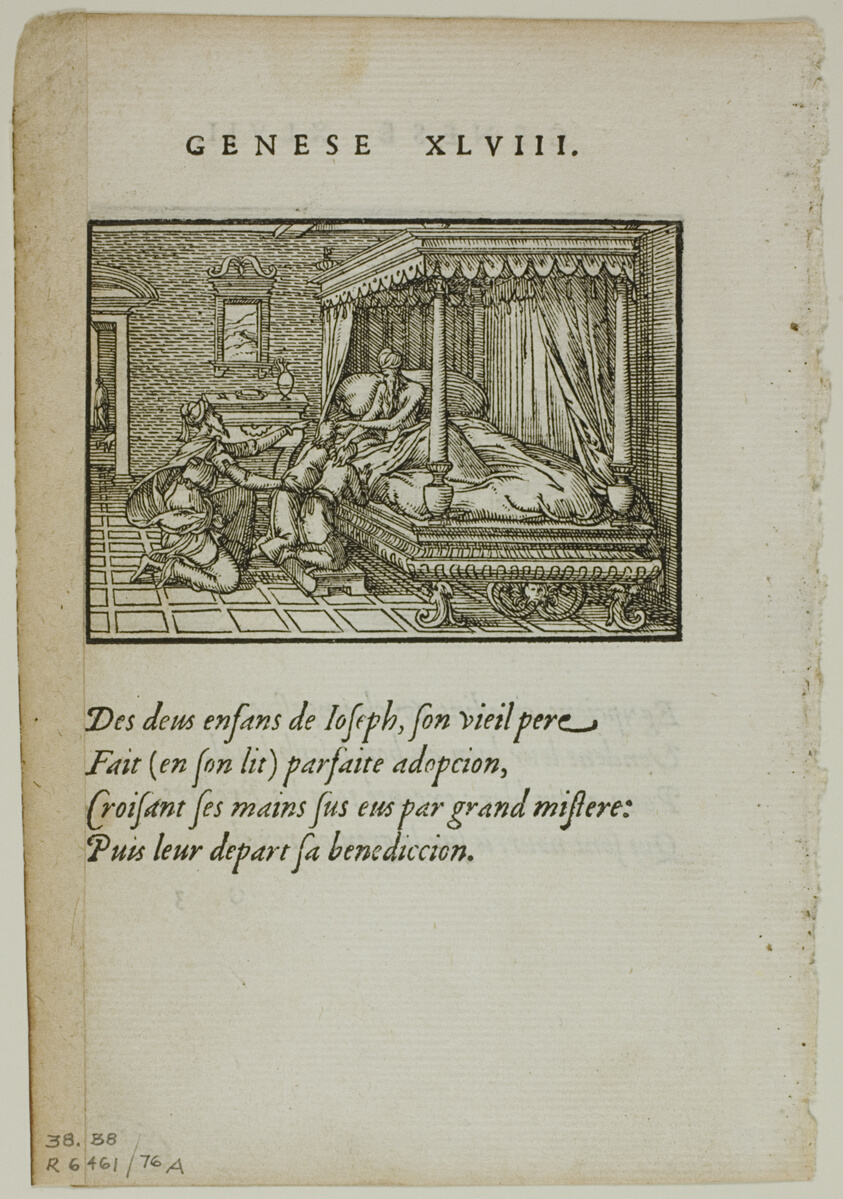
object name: Print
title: Jacob Blessing the Sons of Joseph (recto) and The Egyptians Sell their Goods to Joseph for Grain (verso) from Quadrins poetiques by Paradin, plate 76 from Woodcuts from Books of the XVI Century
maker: Bernard Salomon (French, 1506/10-c.1561); assembled by Max Geisberg (Swiss, 1875-1943)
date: 1558, assembled into portfolio 1937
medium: Woodcut on paper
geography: France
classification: woodcut; print; prints and drawing